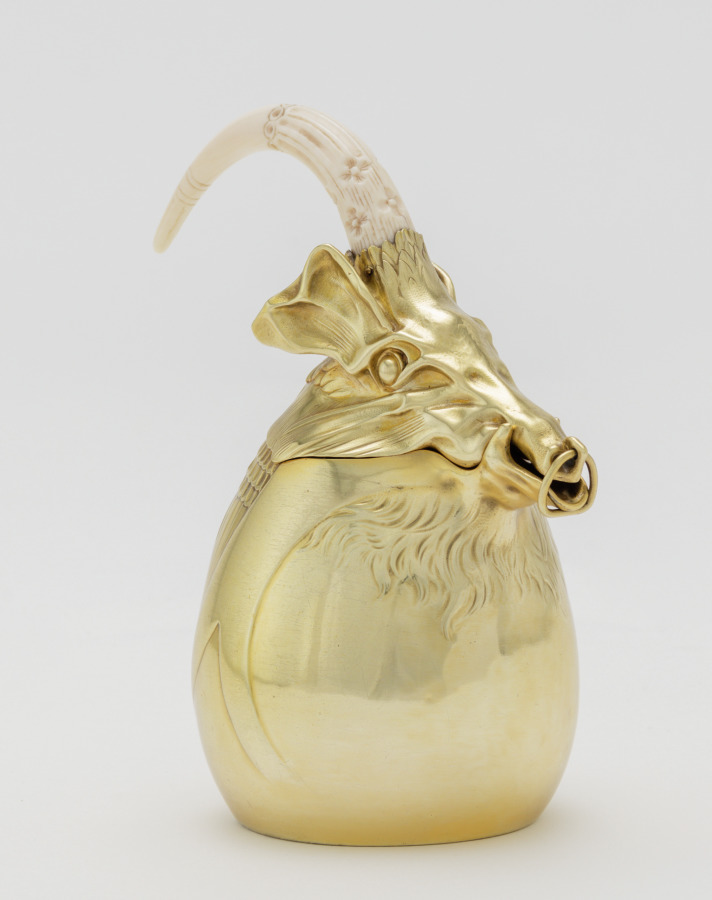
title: Tea Pot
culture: France, Paris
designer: Carlo Bugatti (Italian, 1856–1940)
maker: Adrien-Aurélien Hebrard (French, 1866–1937)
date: c. 1907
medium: Gilt silver and ivory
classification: Silver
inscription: Made by A. A. Hebrard Firm, Paris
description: This tea and coffee service, salver, and table, together with some now missing cups, were all designed by Carlo Bugatti as an ensemble and presented at the 1902 exposition devoted to decorative arts in Turin, Italy. The set was probably acquired from Bugatti's 1907 exhibition at the Galerie Hébrard in Paris by a wealthy South African widow, Anna Blake, who was living there at the time. Some of the animal and insect motifs suggest mythical beasts or the fossils of prehistoric animals. When Mrs. Blake returned to Cape Town, she took these and other pieces designed by Bugatti with her, and they remained in South Africa throughout her lifetime.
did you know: This tea pot is part of a tea and coffee service designed by Carlo Bugatti.